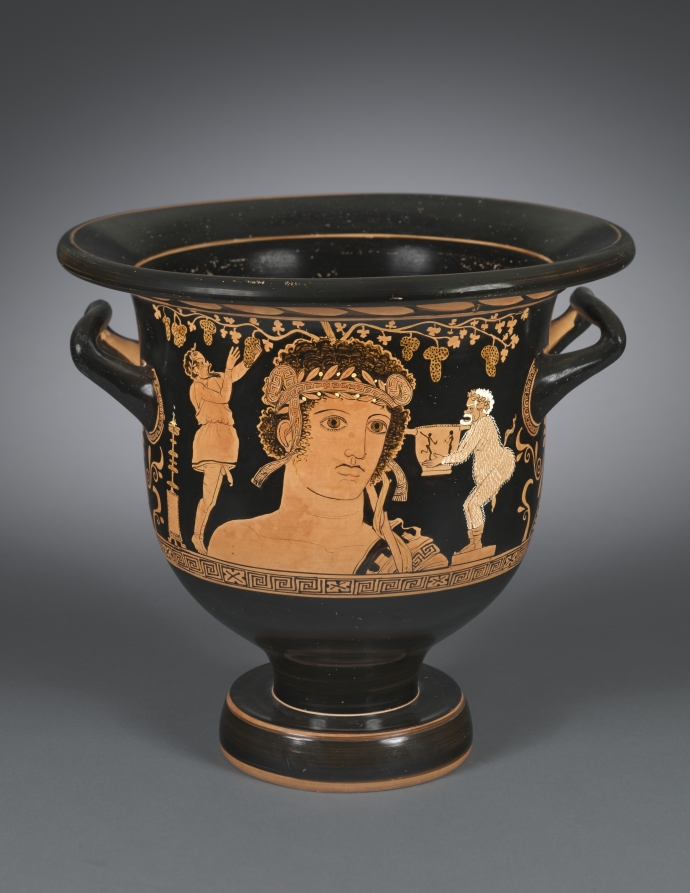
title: Red-Figure Bell-Krater (Mixing Vessel): Bust of Dionysos and Comic Actors (A); Dionysos, Satyr, Maenad (B)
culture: South Italian, Apulian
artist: attributed to Choregos Painter (South Italian, Apulian, active c. 390–380 BCE)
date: c. 390–380 BCE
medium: ceramic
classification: Ceramic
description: Dionysos, the god of wine, theater, and the mysteries, dominates both sides of this bell-krater, a vessel for mixing water and wine. On the front, he appears in bust form, wearing a fillet and laurel wreath. Over his shoulder and behind his head rests his thyrsos, sprouting grapevines. Comic actors, identifiable by their masks and padded costumes, flank the colossal bust, stretching for a bunch of grapes on the left and holding a large skyphos (wine cup) on the right. On the reverse, Dionysos marches in procession with his retinue, a satyr and maenad.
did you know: The large bust of Dionysos may represent a stage prop or symbolize the multifaceted god.